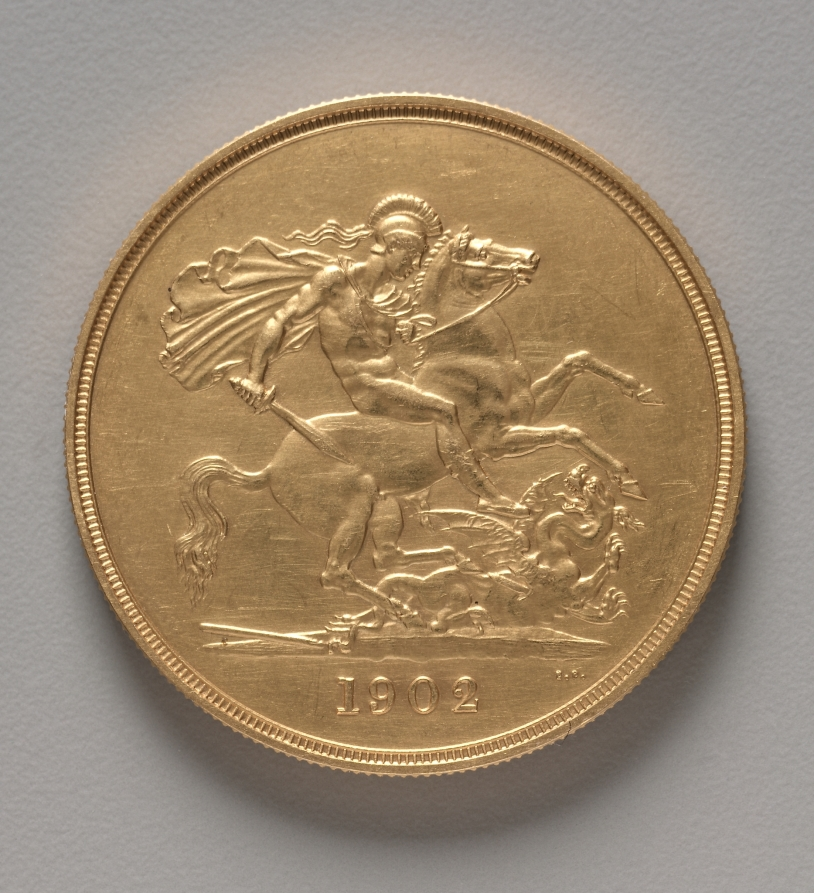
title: Five Pound Piece: St. George and the Dragon (reverse)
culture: England, Edward VII, 1901-1910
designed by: after Benedetto Pistrucci (Italian, 1784–1855)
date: 1902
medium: gold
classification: Coins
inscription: below: 1902.